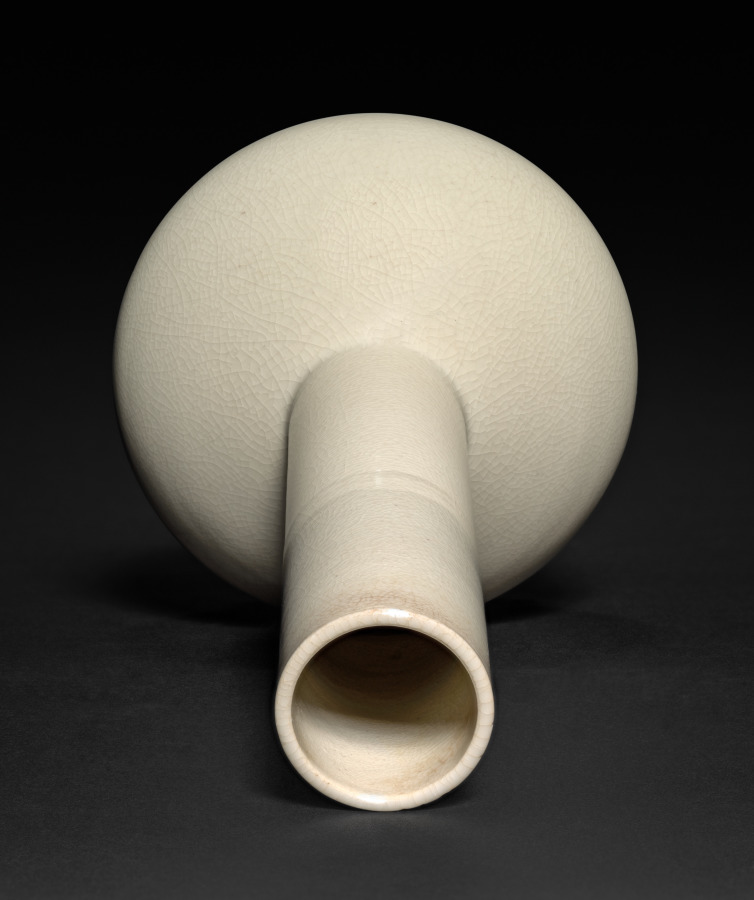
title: Long-Necked Vase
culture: Japan, Meiji period (1868–1912)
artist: Seifū Yohei III (Japanese, 1851–1914)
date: 1893–97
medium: Stoneware with crackled glaze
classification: Ceramic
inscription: 大日本清風造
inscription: 帝室技芸員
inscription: 清風盧人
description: The glazing of this long, narrow-necked and bulbous-based vase has a network of shallow cracks, created when the glaze fractured as it cooled from firing. It is called a cracked-ice pattern or glaze, since the effect resembles the surface of a frozen lake. The cracks here are of a consistently high density throughout the vessel. This pattern is observed also in the transparent glaze of some Kyoto ware, in some of Yohei III’s green glazes, and in some of his vessels emulating Chinese forms. The interior of the box lid has an attestation to its authenticity by Yohei IV, and the footring is inscribed Seifū of Great Japan (Dai Nihon Seifū) in iron black.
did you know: Seifū Yohei III apprenticed in the Seifū studio, married into the family, and later adopted the Seifū Yohei name, when he became head of the studio.